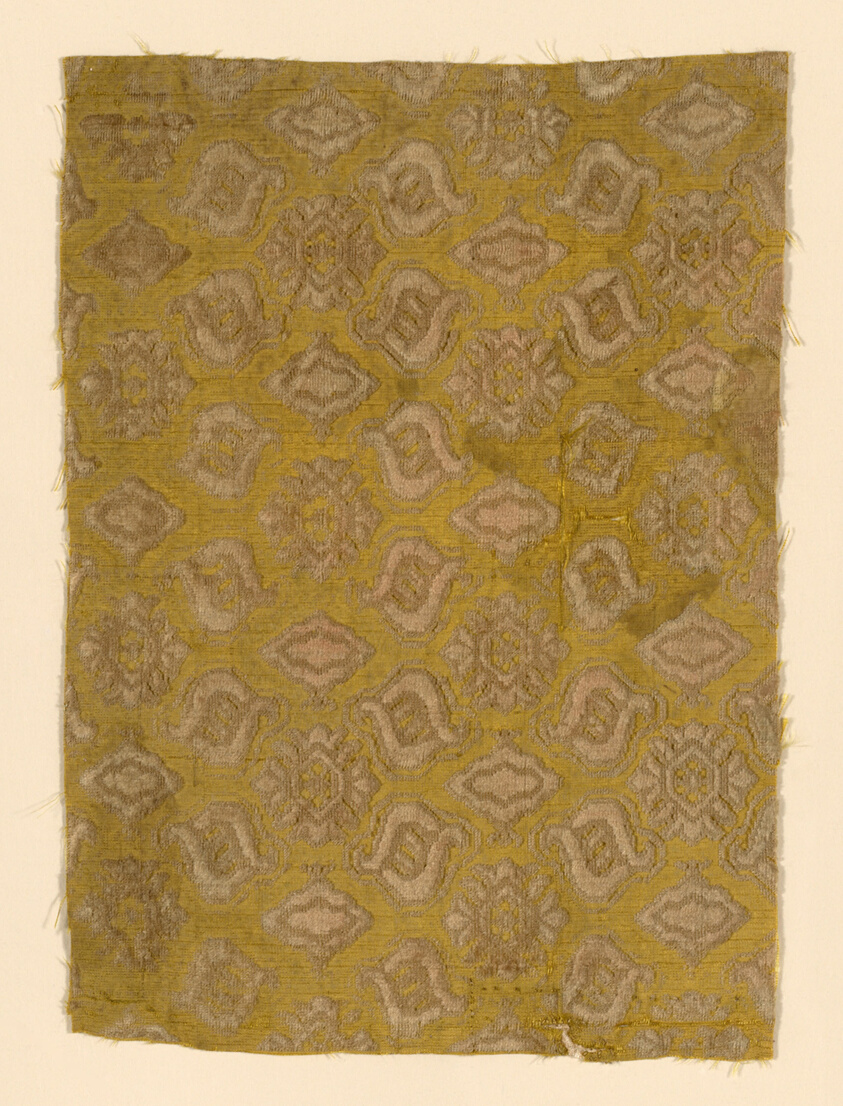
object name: Textile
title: Fragment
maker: Spain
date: 1575/1625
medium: Silk, plain weave with supplementary pile warps forming cut and uncut voided velvet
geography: Spain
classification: textile; weaving - velvet; weaving